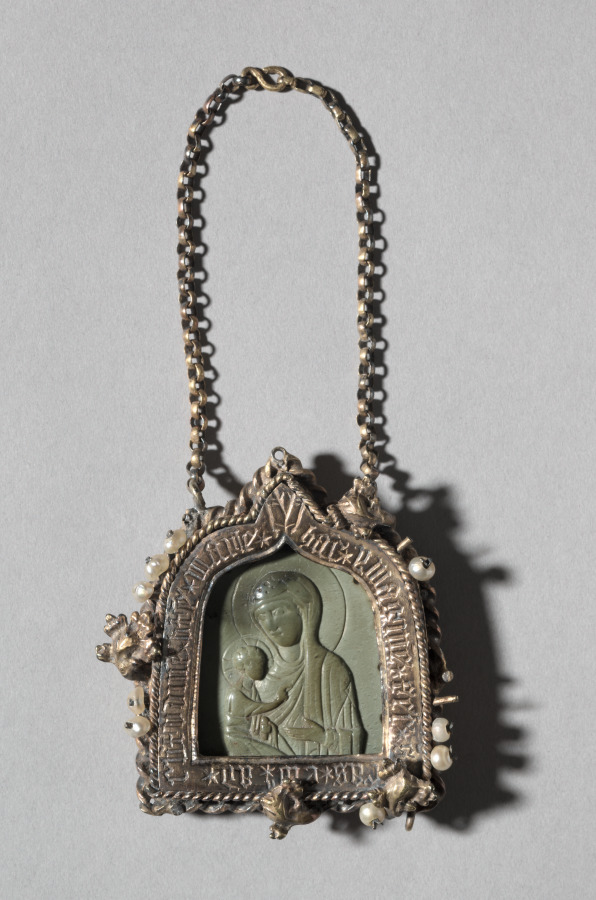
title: Pendant Icon with the Virgin "Dexiokratousa" and Frame with Winged Bull of Saint Luke on the back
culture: Byzantium (pendant); Germany, Aachen (frame), Byzantine period, 12th century (pendant); Byzantine period, 14th century (frame)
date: pendant 1100s; frame mid-1300s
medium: steatite, gilt silver, pearls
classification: Glyptic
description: This small-scale Byzantine icon depicts a half-length figure of the Virgin holding the Christ child. When the icon was mounted in its present frame by a German artist in the 14th century, it was considered to be an authentic portrait painted by Saint Luke. This claim, made in an inscription on the frame, is further emphasized by the ox, Saint Luke’s symbol, engraved on the frame’s reverse.